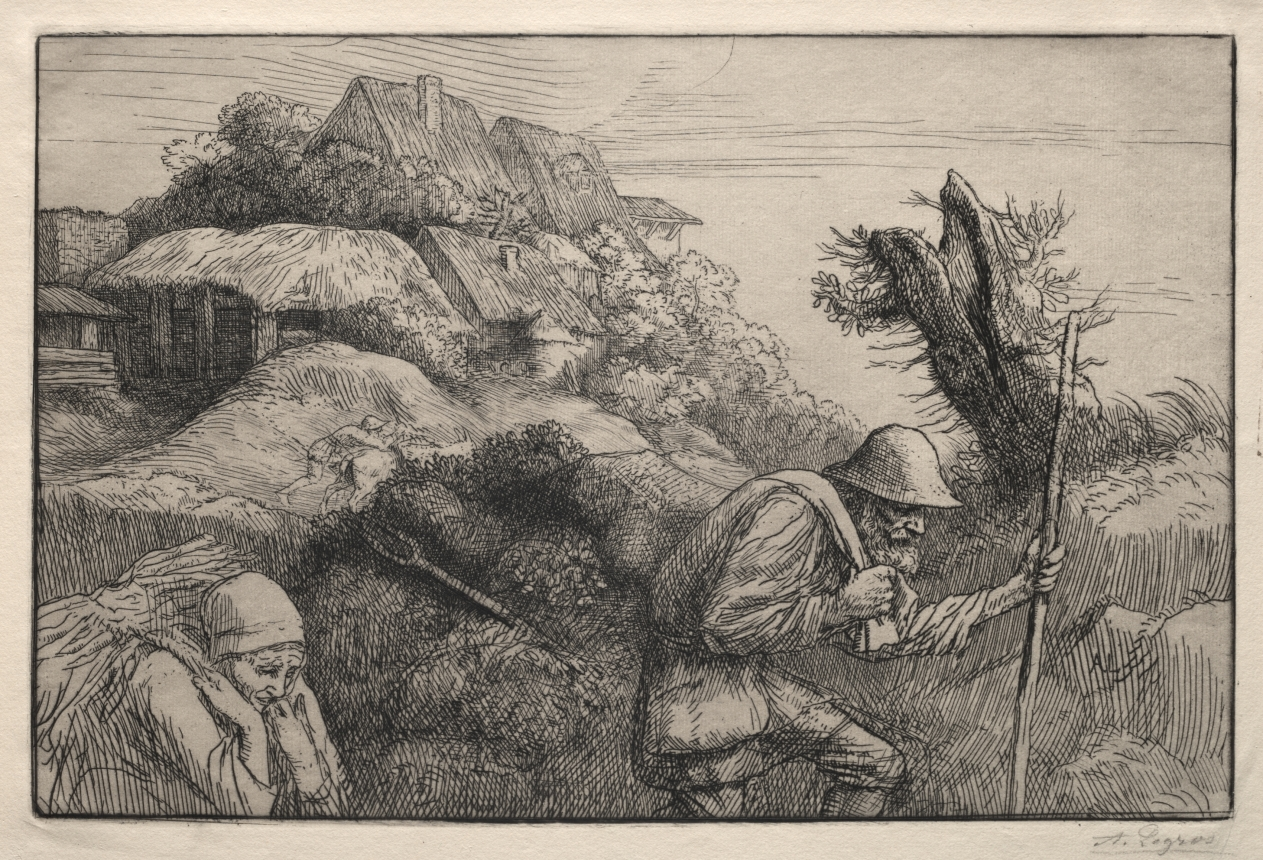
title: Return from the Woods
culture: France, 19th-20th century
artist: Alphonse Legros (French, 1837–1911)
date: c. 1857–1911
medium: etching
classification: Print